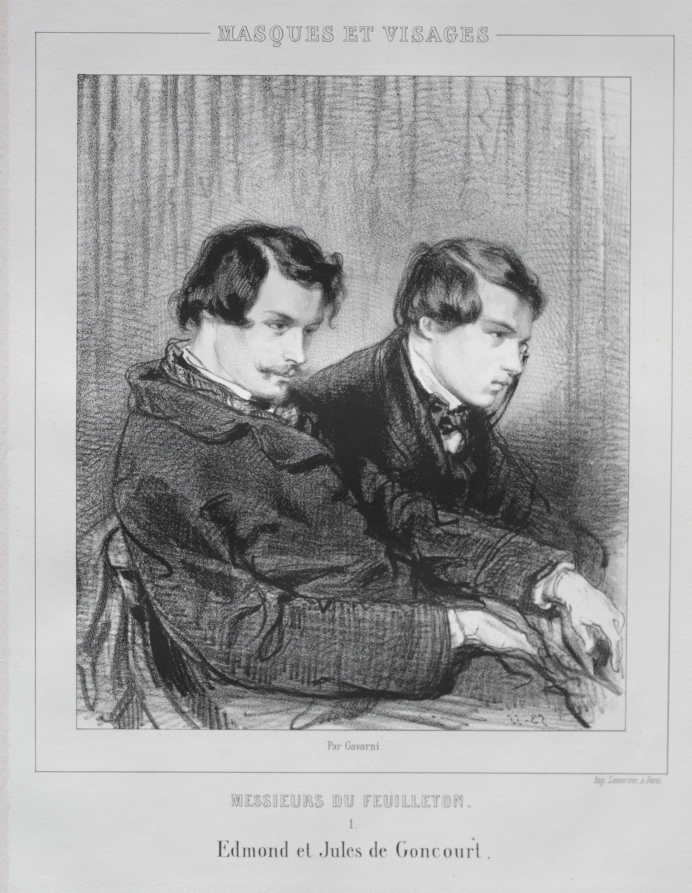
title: Edmond and Jules de Goncourt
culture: France, 19th century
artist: Paul Gavarni (French, 1804–1866)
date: 1853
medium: lithograph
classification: Print